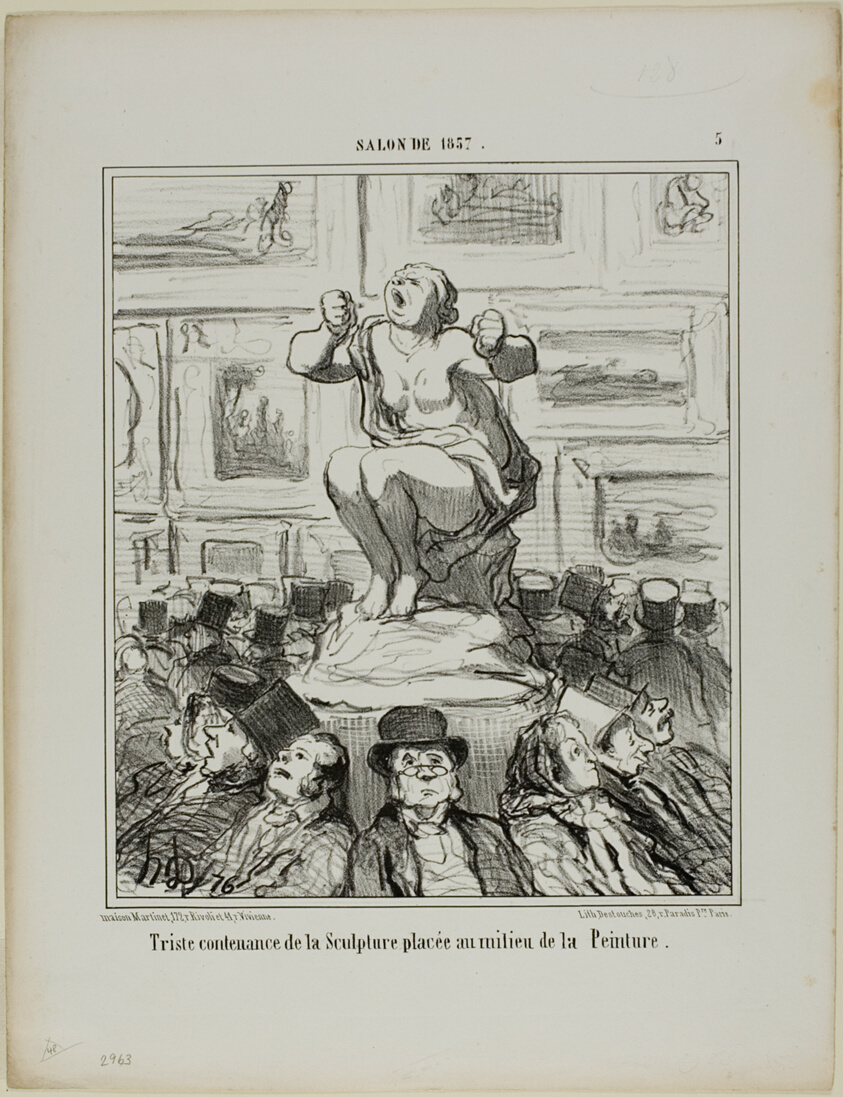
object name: Print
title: The Displeasure of a Sculpture Placed in the Middle of an Exhibition of Paintings, plate 5 from Salon De 1857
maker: Honoré Victorin Daumier; French, 1808-1879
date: 1857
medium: Lithograph in black on white wove paper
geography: France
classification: lithograph; print; prints and drawing